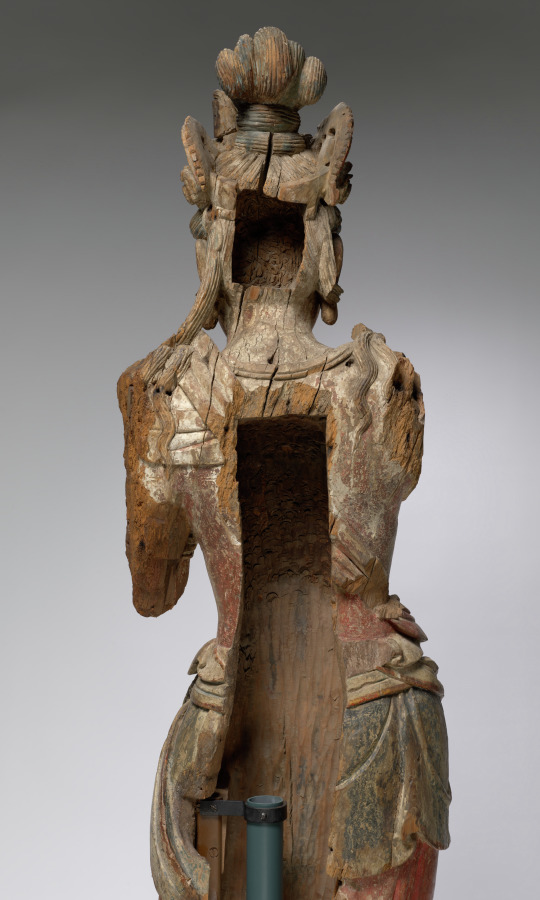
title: Eleven-Headed Guanyin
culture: China, late Northern Song dynasty (960-1127) - Jin dynasty (1115-1234)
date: 1100–1200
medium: wood with polychromy and cut gold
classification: Sculpture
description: The bodhisattva is an enlightened being dedicated to the spiritual awakening of all beings. The compassionate bodhisattva Guanyin, in a variety of manifestations, is probably the most popular deity of worship in Chinese Buddhism. In the Esoteric Buddhist form shown here, this standing Guanyin has a total of eleven heads, with smaller ones above the principal head. The uppermost head represents the Buddha Amitabha, to whom he is closely related. The eleven heads symbolize the Buddha’s steps on the path to enlightenment.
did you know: This Guanyin is carved from a single block of willow (genus Salix sp.).